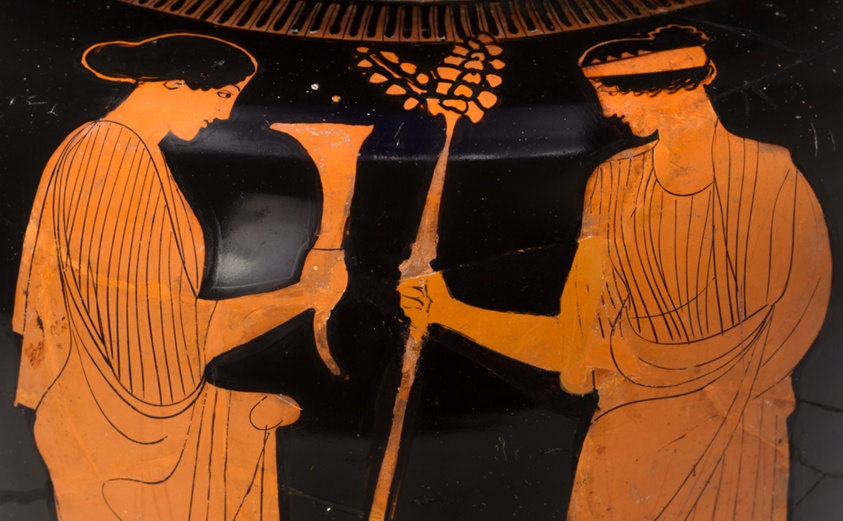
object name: Vessel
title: Stamnos (Mixing Jar)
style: high classical, Classical, attic, red-figure, ancient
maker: Attributed to the Chicago Painter; Greek; Athens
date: about 450 BCE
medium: terracotta, red-figure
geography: Athens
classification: vessel; earthenware; ceramics; ancient art; container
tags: drinking, dining, women, human figures, Greek, females, festivals, female figures, daily life, men, chairs, Greece, cups, interiors